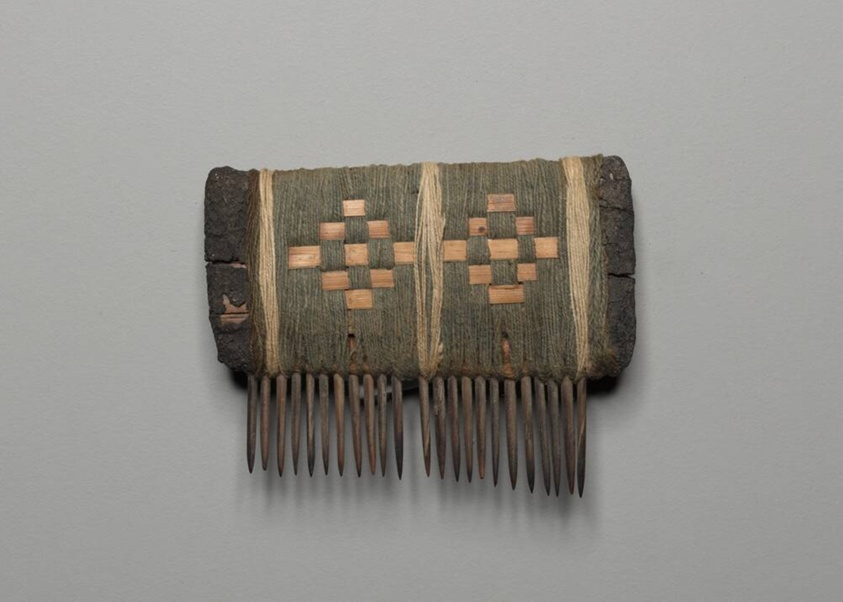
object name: Textile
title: Weaving comb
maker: Peru, Possibly central coast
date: 1000/1476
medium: Wood, cotton, split reed and resin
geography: Peru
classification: textile; textile working equipment; weaving; accessories (object genre)